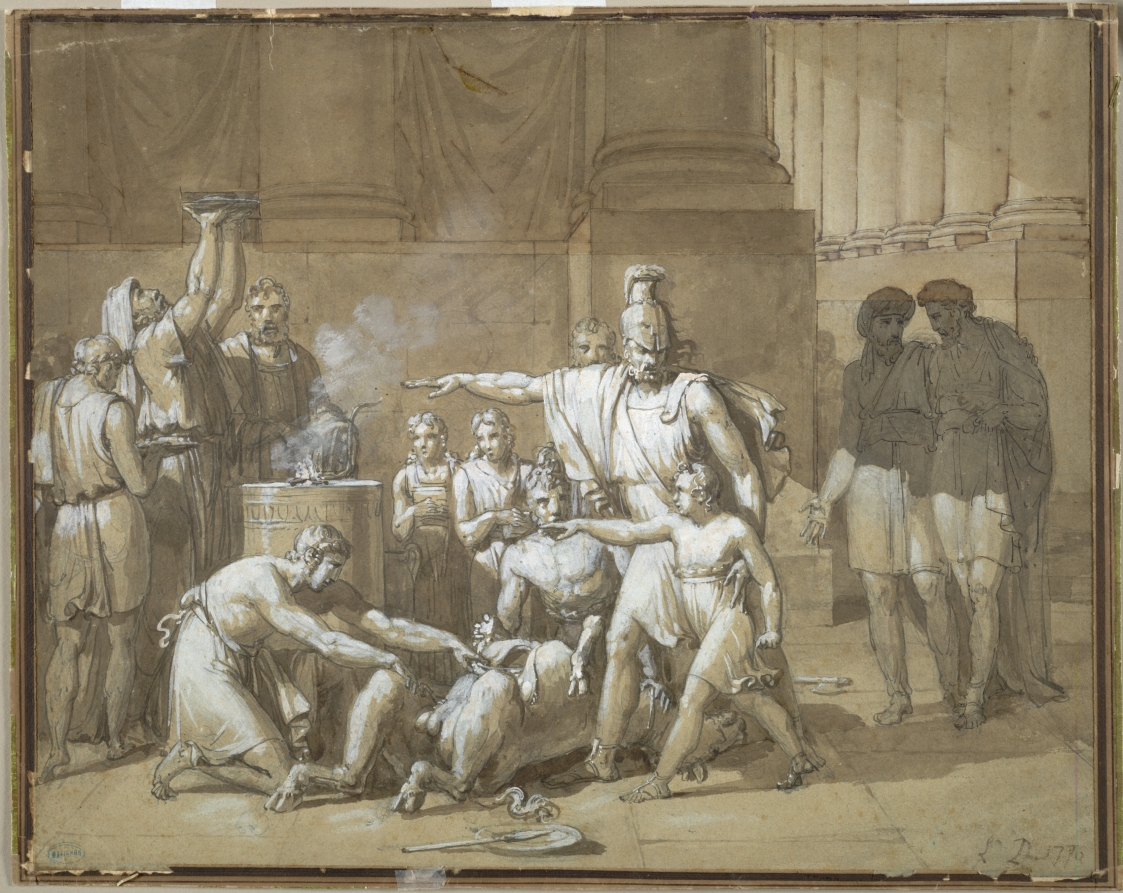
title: Hannibal Swearing Eternal Enmity toward Rome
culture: France, 19th century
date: c. 1808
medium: pen and black and brown ink, brush and brown and gray wash, and white paint over graphite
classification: Drawing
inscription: lower right, in brown ink: L D 1776; verso, lower left, in graphite: David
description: This scene from ancient history shows a moment in the boyhood of the great Carthaginian general Hannibal (247-about 183 bc). While sacrificing to the gods in preparation for a military campaign, Hannibal's father decided to have his son swear an oath to remain the eternal enemy of Rome. At the center of the composition, the nine-year-old Hannibal imitates the gesture and stance of his father, while a bull is sacrificed below. The unknown creator of the scene probably planned to make a larger painting of it because important events from antiquity, such as this one, were typical subjects for the period. In addition, the overall use of pen and brush with white highlights for modeling was a technique frequently used to finalize a composition before realization on a larger scale in oil.